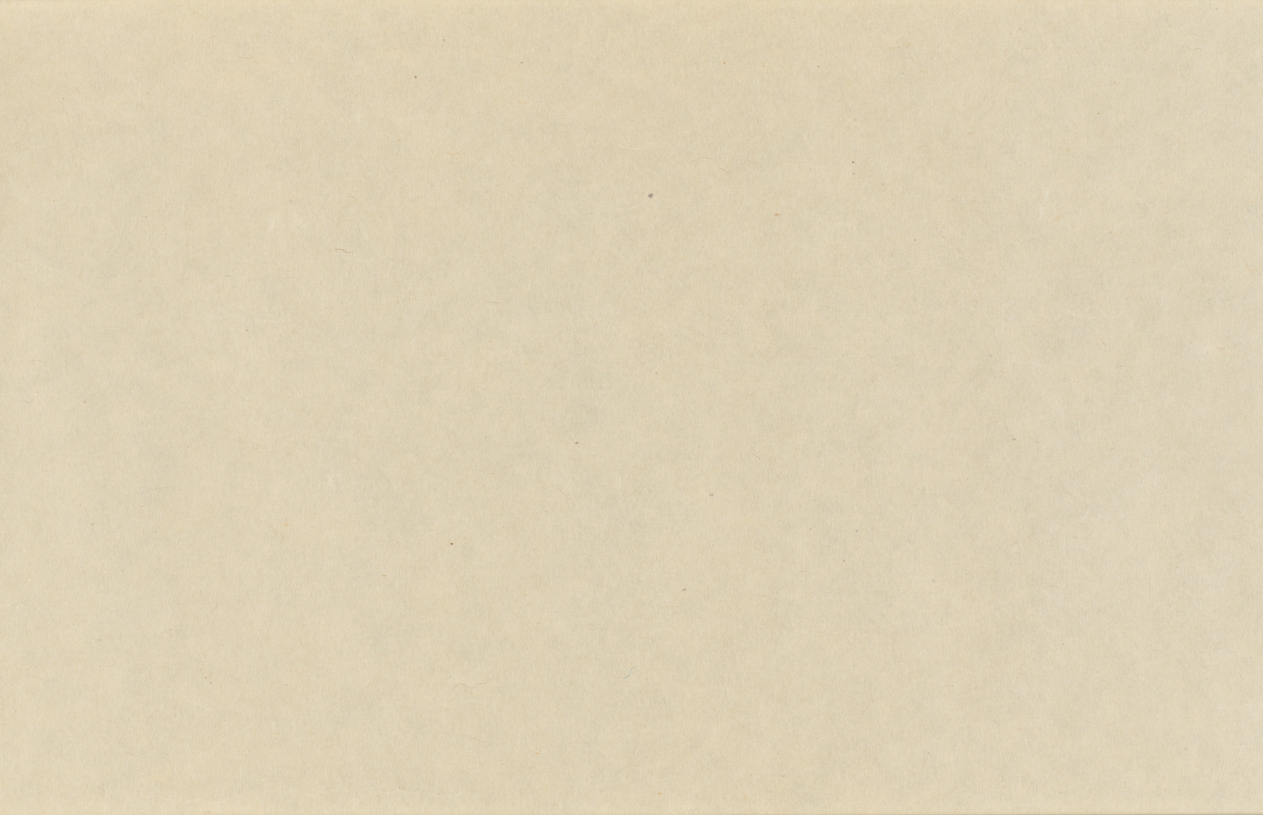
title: Eight Views of Xiao-Xiang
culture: Japan, Muromachi period (1392–1573)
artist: Sesson Shūkei (Japanese, c. 1492–c. 1577)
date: 1500s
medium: handscroll; ink on paper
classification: Painting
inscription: Signature and seal of artist at end of painting.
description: Eight Views of the Xiao and Xiang Rivers can be traced to 11th-century Chinese poems and paintings, the depiction of which had also become popular among Korean and Japanese painters. Xiao-Xiang refers to the region in present-day Hunan province where the Xiao and Xiang rivers converge. Few painters of the Eight Views had in fact seen the scenery; rather, they were trying to portray in ink and wash the lyrical qualities of dim light and a misty atmosphere typical of that region. Each of the poetic titles suggests a time of day, a season, or specific atmospheric conditions—subjects that challenged the abilities of the most talented artists. In this miniature painting (shukuzu) of the Muromachi period, Japanese Zen monk and painter Shukei Sesson depicted all eight views featured in Chinese prototypes: Wild Geese Descending to Sandbar; Returning Sails Off a Distant Coast; Mountain Market in Clearing Mist; River and Sky in Evening Snow; Autumn Moon over Dongting Lake; Night Rain on the Xiao and Xiang; Evening Bell from Mist-Shrouded Temple; and Fishing Village in Evening Glow.